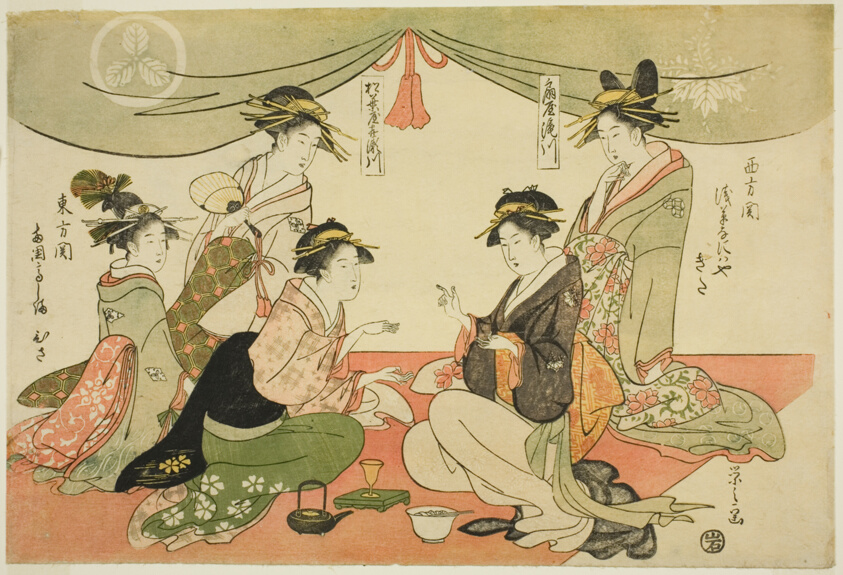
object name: Print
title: Naniwaya Okita and Takashima Ohisa playing a game of ken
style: Japanese (culture or style)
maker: Chobunsai Eishi; Japanese, 1756-1829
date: c. 1793/94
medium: Color woodblock print; oban yoko-e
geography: Japan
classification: woodblock print; print; asian art